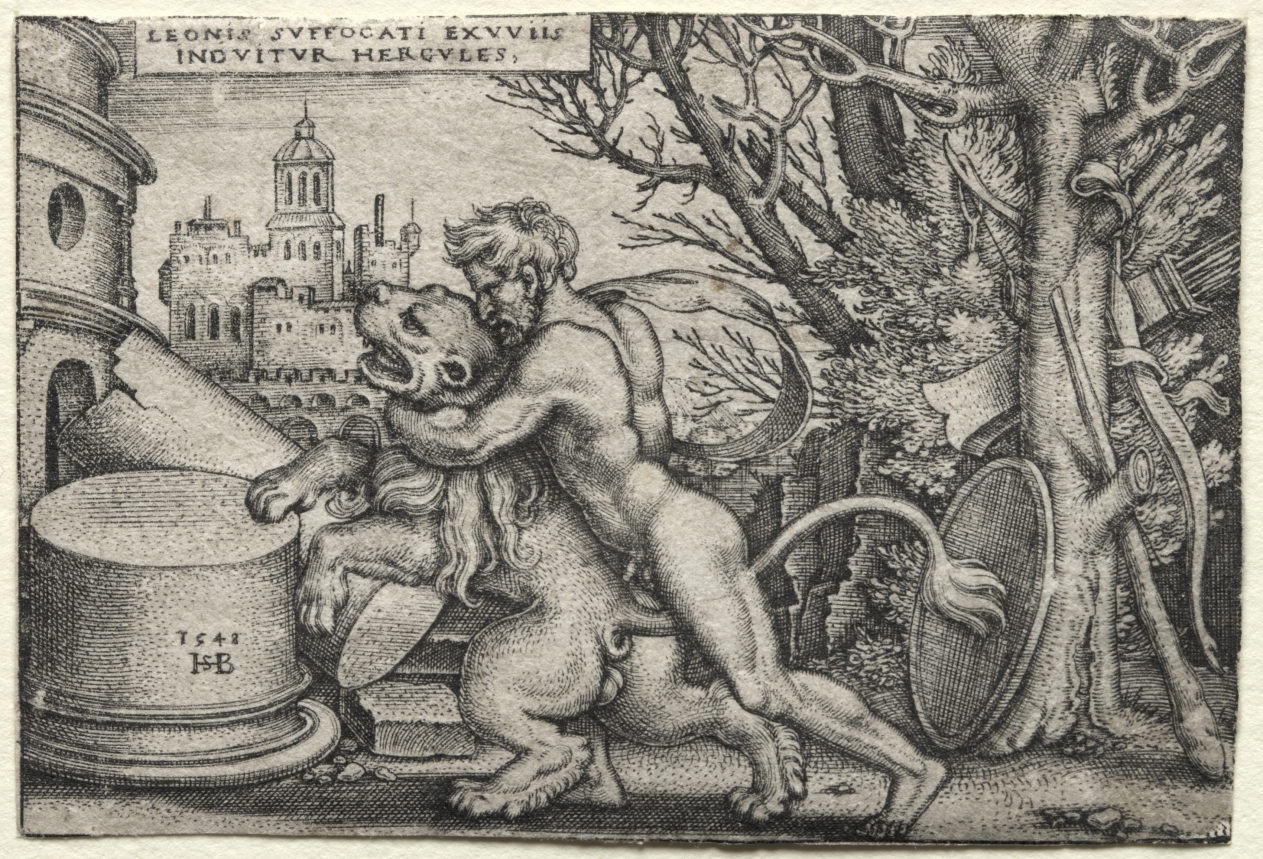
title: The Labors of Hercules: Hercules Strangling the Nemean Lion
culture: Germany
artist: Hans Sebald Beham (German, 1500–1550)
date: 1548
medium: engraving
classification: Print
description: Beham was one of several German printmakers referred to today as the “Little Masters.” They established their artistic prowess by engraving remarkably small prints, appealing to collectors fascinated with miniature objects and curiosities. Here, Beham has packed 12 larger-than-life stories of the mighty Hercules into tiny prints. The series includes three of the 12 labors Hercules performed as penance for slaying his children in a fit of madness: Strangling the Nemean Lion, Killing the Lernean Hydra, and Dragging Cerberus from the Underworld. The other scenes depict tales from his life and the events preceding his death. The son of Jupiter and the mortal Alcmena, Hercules was both man and god. His saga of moral and physical trials made him one of the most popular classical heroes in Renaissance art.